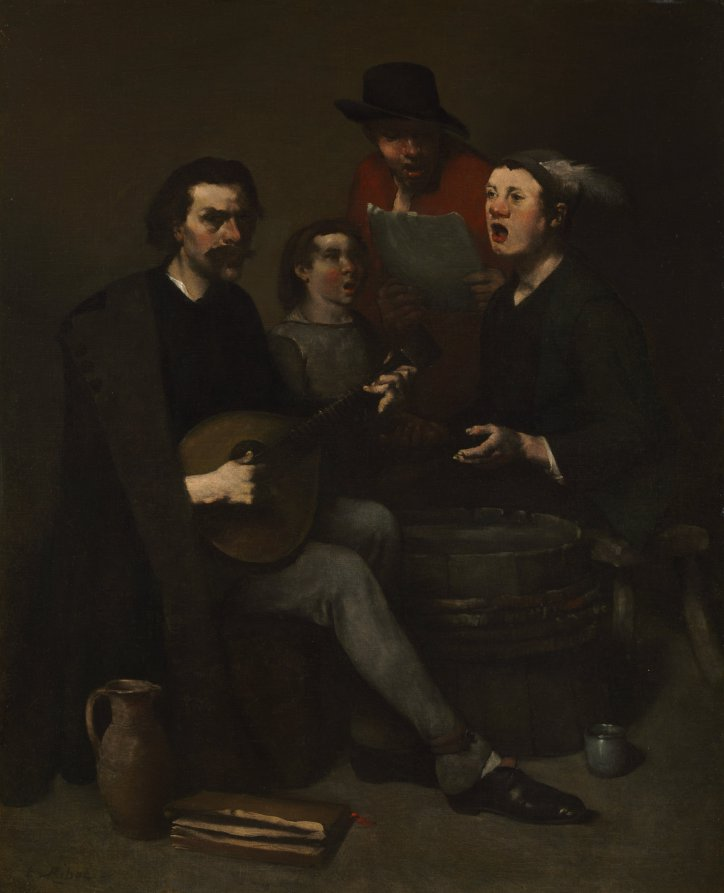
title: Singers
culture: France, 19th century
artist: Théodule Ribot (French, 1823–1891)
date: 1863–1868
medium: oil on fabric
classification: Painting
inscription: Signed lower left: t. Ribot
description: Ribot participated in a loosely defined artistic movement known as Realism, which sought to depict the gritty lives of workers and peasants. Often dark in tone and somber in mood, Realist paintings focused attention on social problems. Poor singers like these could be seen on the streets of Paris, but pictures of such singers were already a long-established theme in art history.